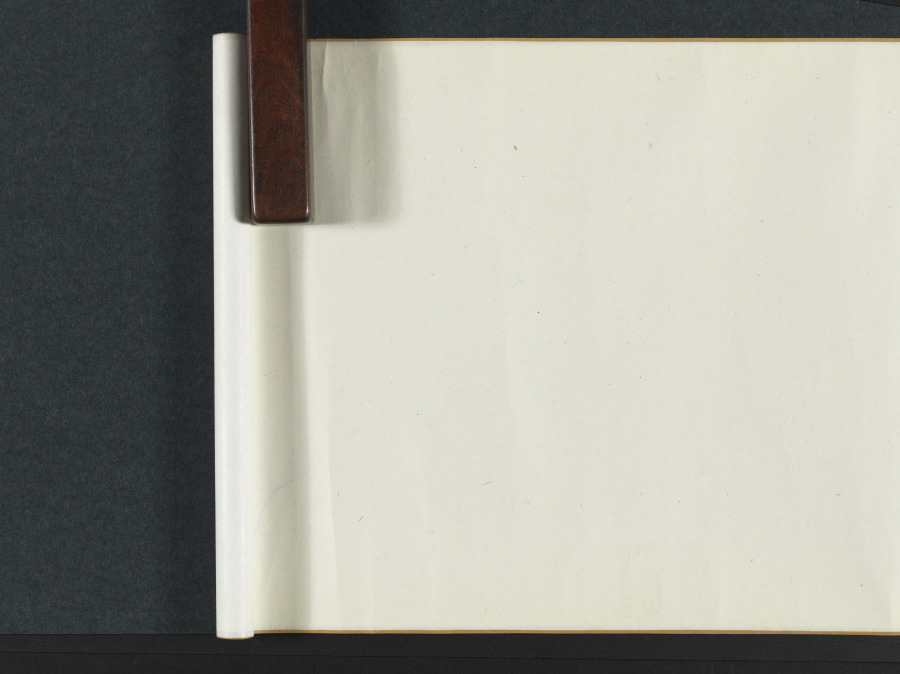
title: Scholar-Hermits in the Autumn Mountains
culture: China, Ming dynasty (1368–1644)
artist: Tang Yin (Chinese, 1470–1523)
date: 1500–1510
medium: handscroll, ink and light color on silk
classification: Painting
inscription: Artist's signature and 2 seals at end of scroll: Tang Yin [seals] T'ang Po-hu; T'ang Tzu'wei t'u-shu.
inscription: Title on frontispiece by Li Cho-kung (dates unknown).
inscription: 1 colophon and 11 additional seals: 1 colophon dated 1915 of Wu Tso-hsi (19th-20th c.); 2 seals of Gao Qifeng 高奇峰 (1889–1933); 5 seals of C. C. Wang 王季遷 (1907–2003); 4 seals unidentified.